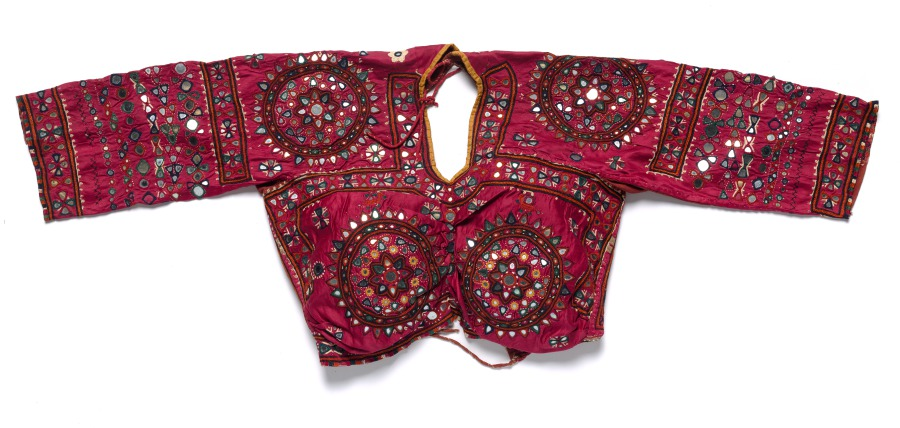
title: Bodice or Choli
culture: Western India, Gujarat, Kachchh or Pakistan, Sindh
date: 1800s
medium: silk on silk satin with mirror-glass inserts, embroidery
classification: Embroidery